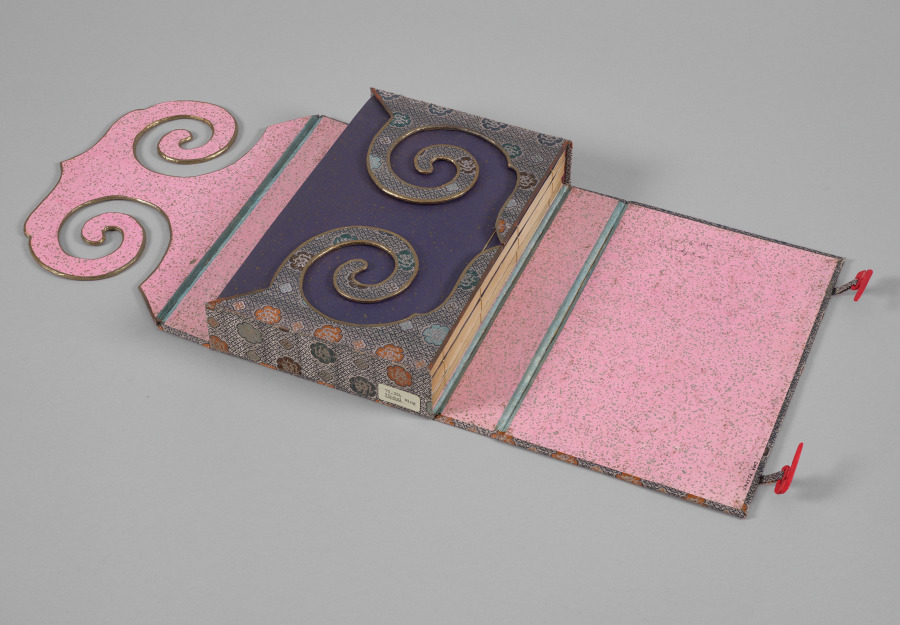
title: Yu-hai (Ocean of Jade) woodblock bound volume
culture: China, Ming dynasty (1368–1644)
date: 1368–1644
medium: woodblock-printed book with painted edges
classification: Bound Volume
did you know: When each book is rolled to form a cylinder, a landscape appears on the edges, painted in ink and washes of color.